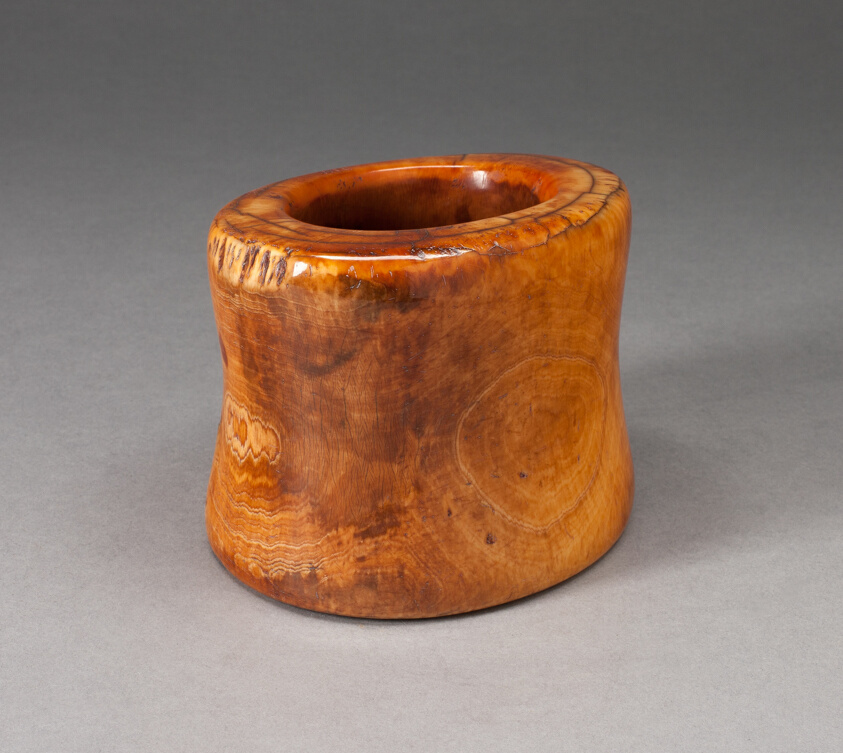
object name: Costume and Accessories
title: Four Bracelets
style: igbo, Arts of Africa, african Art, Coastal West Africa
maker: Igbo; Nigeria; Coastal West Africa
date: Probably 19th century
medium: Ivory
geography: Nigeria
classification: bracelet (jewelry); ivory; jewelry; arts of Africa; african art; costume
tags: costume